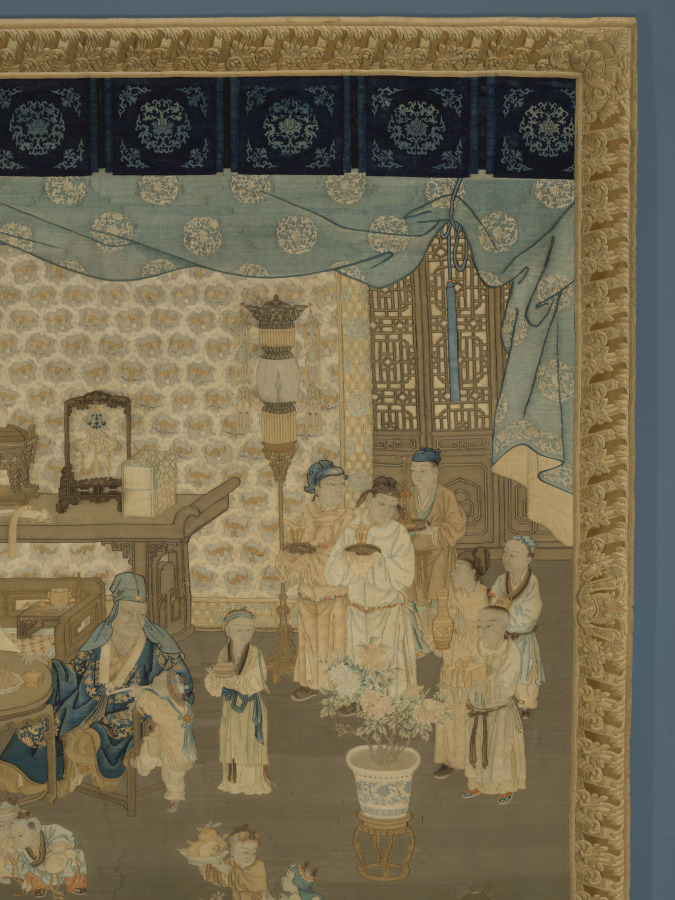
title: Family Gathering on New Year's Morning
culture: China, Qing dynasty (1644-1911)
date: late 1760s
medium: Silk and wool: tapestry weave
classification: Tapestry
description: This European-style tapestry depicts a family gathering, in a woven Western picture frame, that presumably once furnished the Hall of Cultivating the Mind (Yangxin dian) in the Forbidden City. The tapestry employs Western perspective and shading combined with the traditional Chinese subject of a family gathering in a palace, including motifs expressing wishes for good fortune and for a peaceful reign. In 1766, six French tapestries had been presented to the Chinese court. The Qianlong emperor was so intrigued that he commissioned tapestries in the French style from Suzhou. Records mention an imperial order for tapestries in the Western style, such as this one, in 1769, 1770, and 1775.